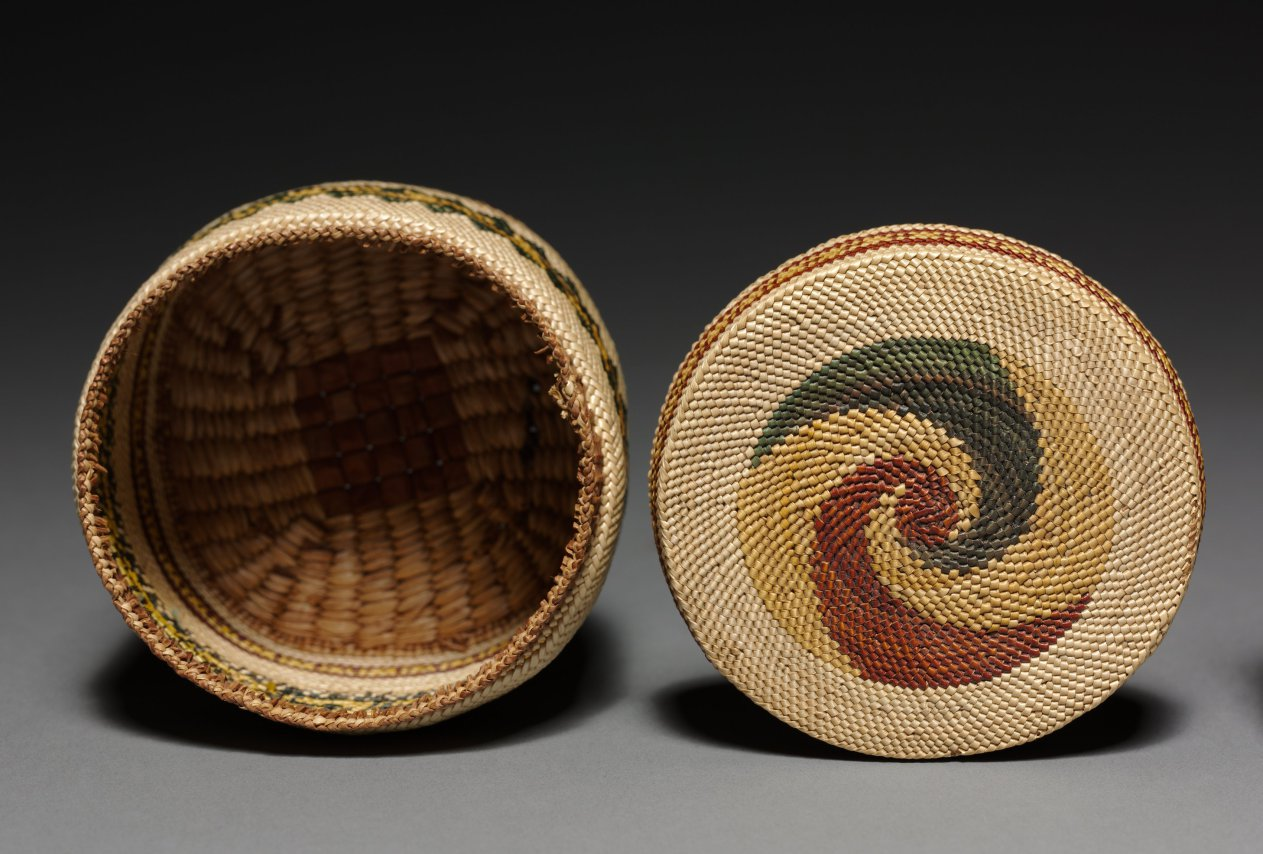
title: Covered Bowl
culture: Northwest Coast, Makah, late 19th-early 20th century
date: c. 1875–1925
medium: twined grasses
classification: Basketry